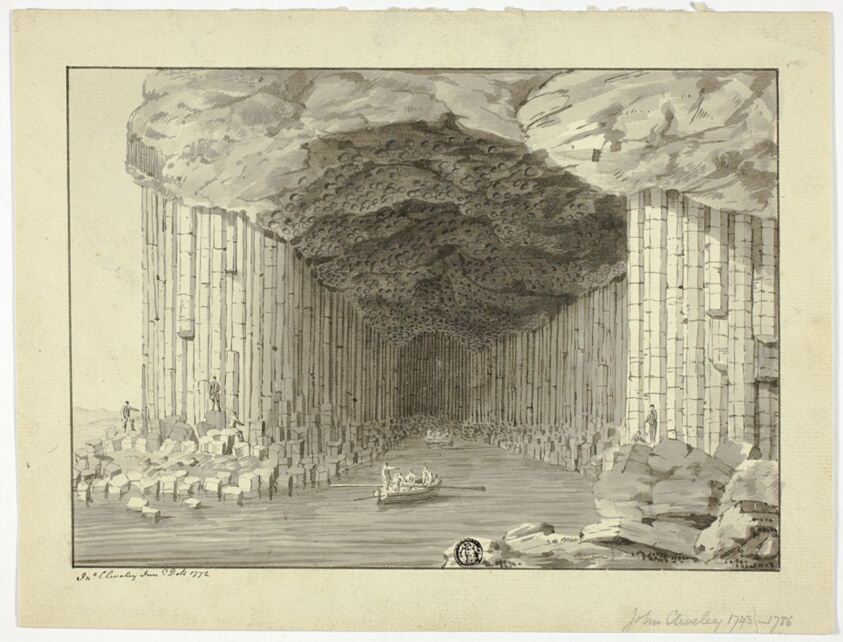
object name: Drawing and Watercolor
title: Fingal's Cave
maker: John Clevely, II (English, 1747-1786)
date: 1772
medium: Pen and black ink and brush and gray wash with graphite, on cream laid paper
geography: England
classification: ink or chalk wash; drawings (visual works); prints and drawing